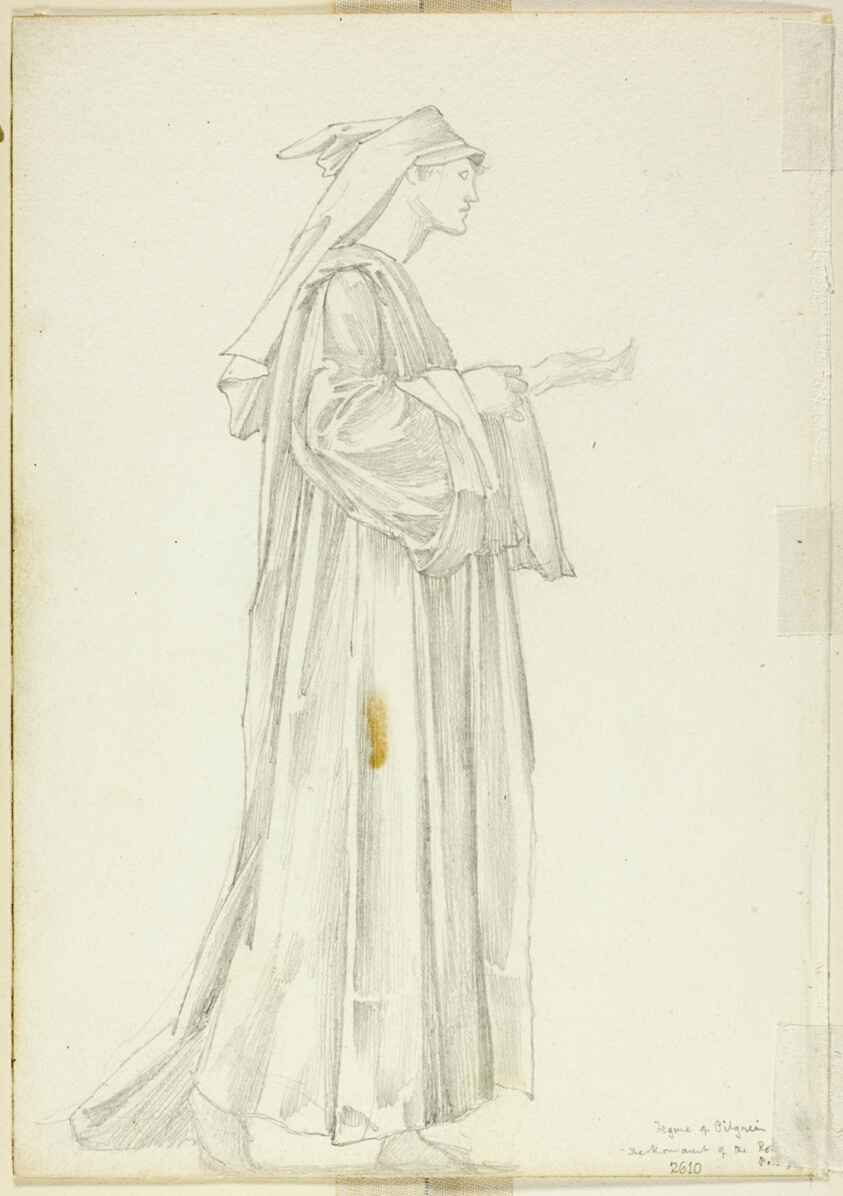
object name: Drawing and Watercolor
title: Study of Pilgrim for Romaunt of the Rose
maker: Sir Edward Burne-Jones (English, 1833-1898)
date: c. 1873–77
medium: Graphite on ivory wove paper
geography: England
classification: graphite; drawings (visual works); prints and drawing